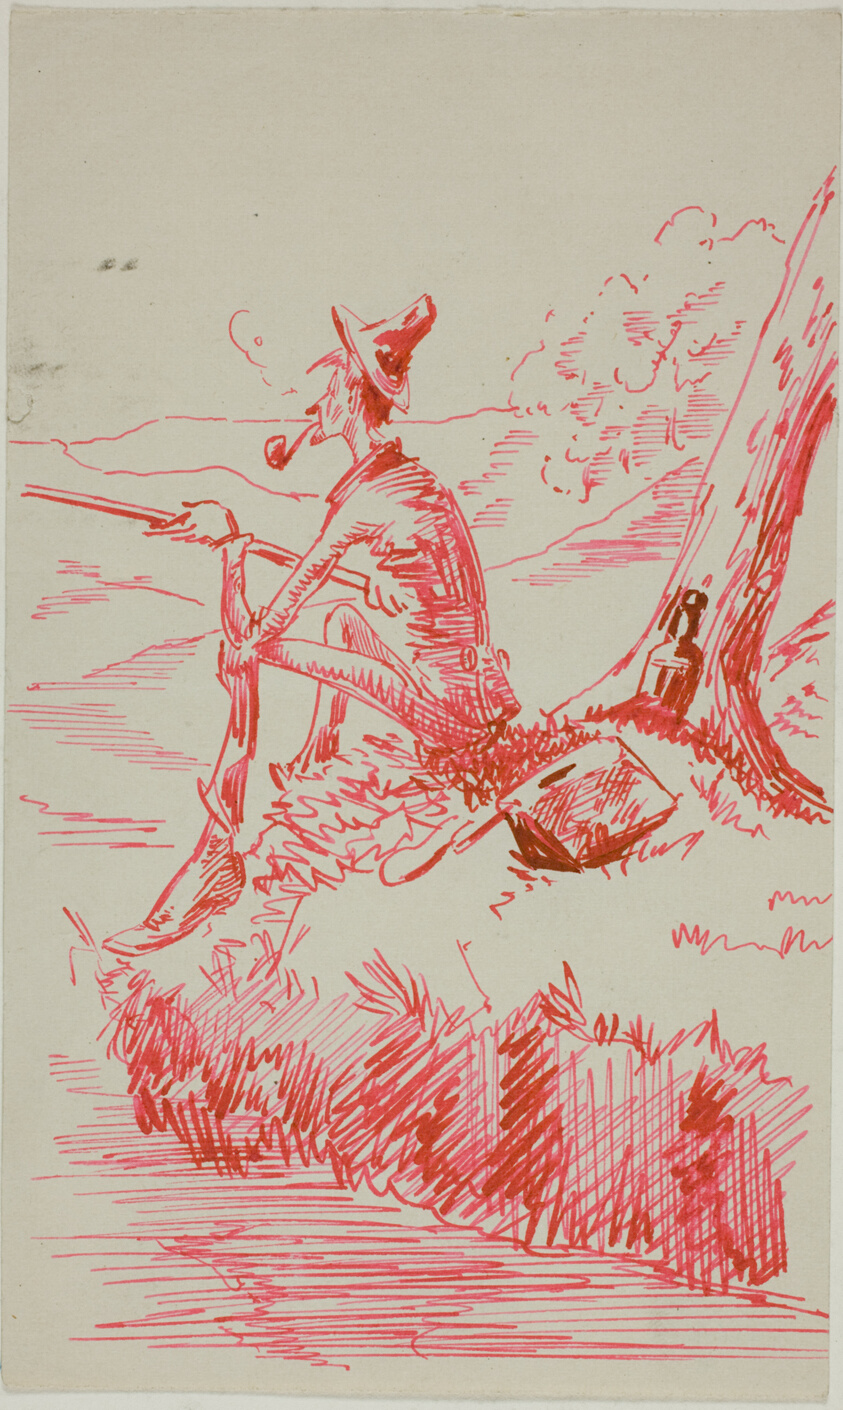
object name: Drawing and Watercolor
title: Man Fishing on Bank of River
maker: Anders Zorn (Swedish, 1860-1920)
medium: Pen and red ink, on ivory wove paper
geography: Sweden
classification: pen and ink drawings; drawings (visual works); prints and drawing